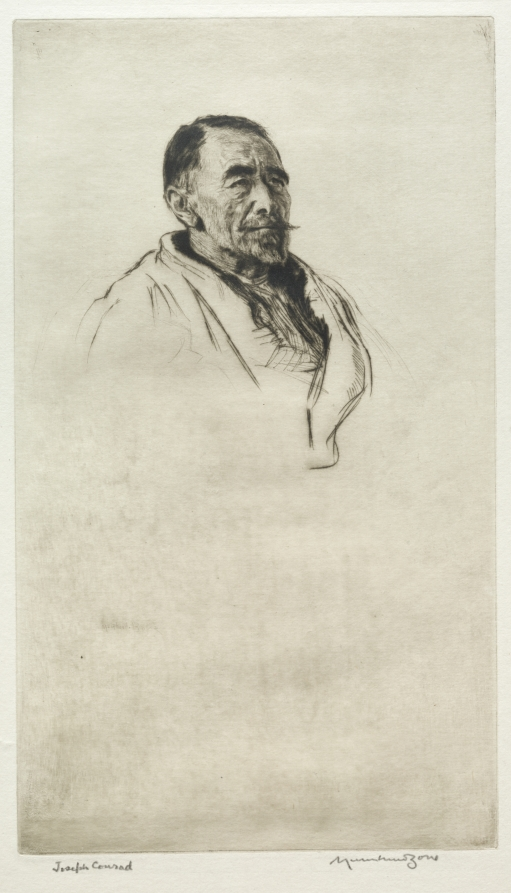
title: Arthur Joseph Conrad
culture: England, 20th century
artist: Muirhead Bone (British, 1876–1953)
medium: drypoint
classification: Print